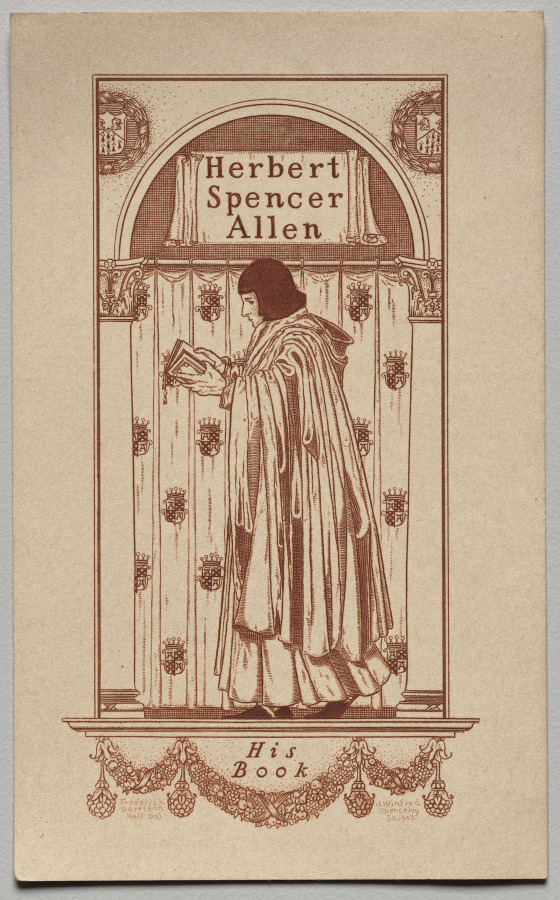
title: Bookplate: Herbert Spencer Allen, His Book inscribed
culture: America, early 20th Century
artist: Frederick Garrison Hall (American, 1879–1946)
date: 1903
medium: engraving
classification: Print